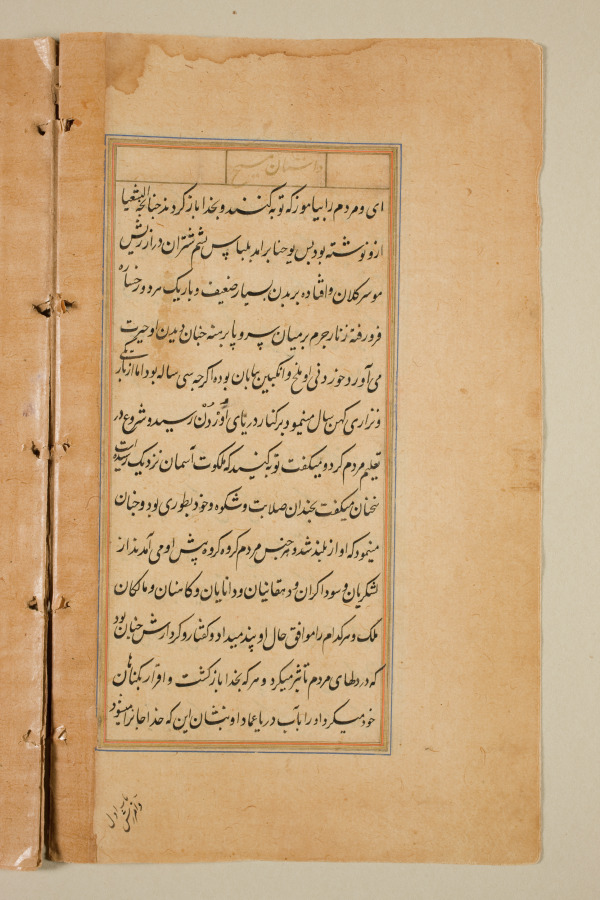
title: Text page from a Mirror of Holiness (Mir’at al-quds) of Father Jerome Xavier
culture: Mughal India, Allahabad, made for Prince Salim (1569–1627)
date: 1602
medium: Ink and gold on paper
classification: Manuscript